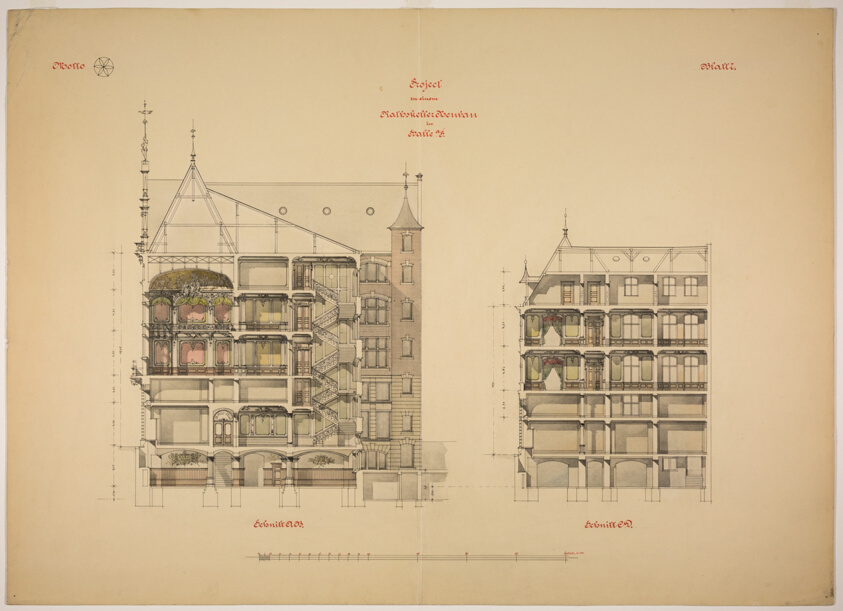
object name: Architectural Drawing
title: Rathskeller Neubau, Halle (Saale), Saxony-Anhalt, Germany, Two Sections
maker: Peter J. Weber; American, born Germany, 1863-1923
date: c. 1887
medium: Graphite, ink, watercolor, and tempera on paper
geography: Saxony-Anhalt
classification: design drawing; architectural drawing